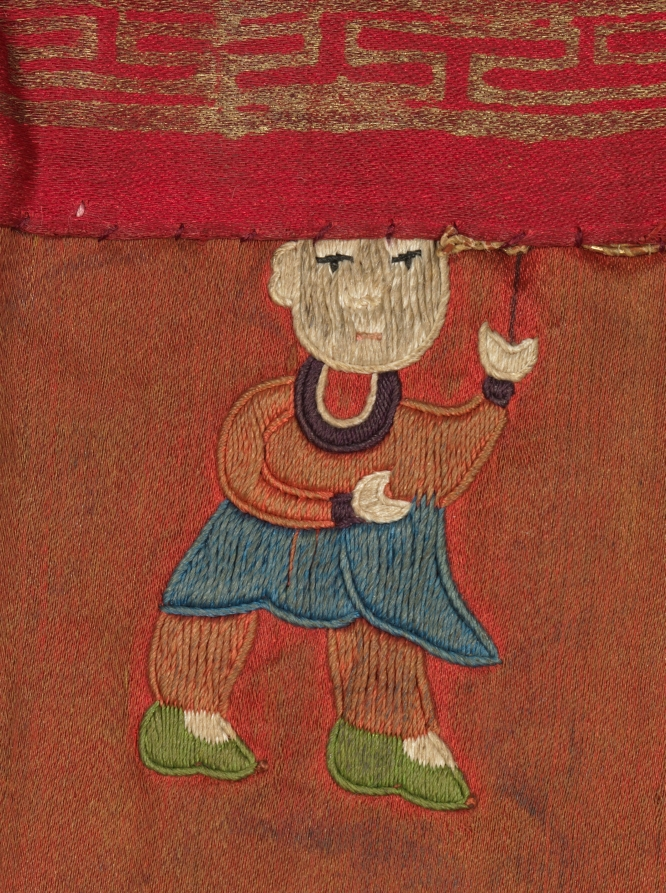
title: Bridal Robe (Hwarot)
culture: Korea, Joseon dynasty (1392–1910)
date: late 1800s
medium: Silk: satin weave; embroidery; paper edging on neck and sleeves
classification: Garment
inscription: 壽如河海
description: This bride's robe is exquisitely embroidered with various symbols of happiness in colorful silk threads. Butterflies stand for marital happiness; the phoenix, numerous offspring; and lotus flowers and white cranes, longevity. Yet, the bridal robe does not attest to the life of luxury. To the contrary, many traces of repairs, trimmings, and patchwork, reflect Joseon period women’s commitment to value neo-Confucian aesthetics of frugality and modesty. Substantial repairs and patching reveal that this robe served as an important communal resource to be shared and passed down through several generations. Its collar and sleeves are covered in thick white paper; this paper is replaced with new paper for each bride, while the robe itself was reused for decades.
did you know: This bride's robe is made of densely embroidered silk, but its collar and sleeves are covered in thick paper.